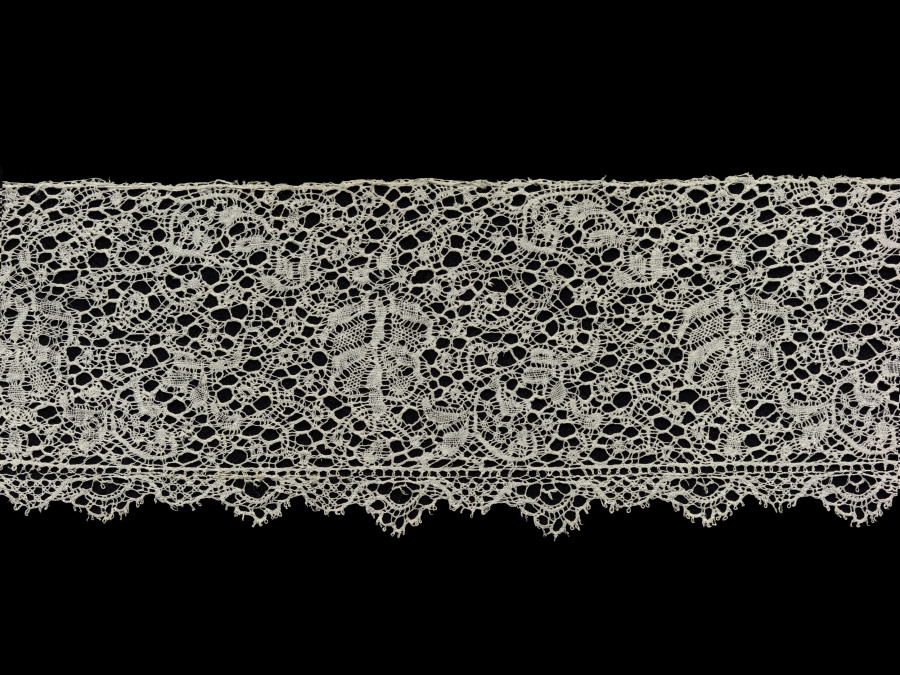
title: Lace Edging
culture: Belgium, Binche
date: 1700s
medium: Bobbin lace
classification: Lace